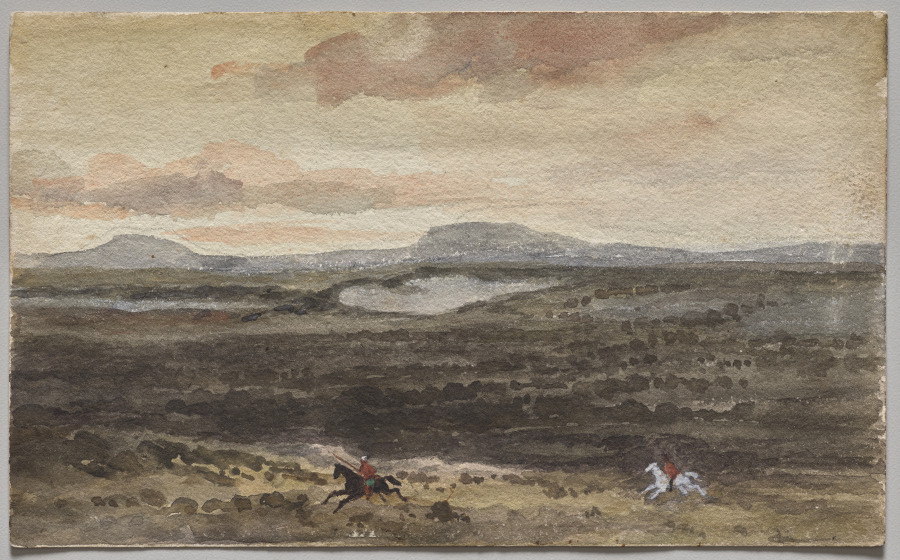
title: View of the Midwest Plains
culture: America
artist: Frédéric Auguste Bartholdi (French, 1834–1904)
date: c. 1871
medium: watercolor, graphite, ink wash, and gouache on paper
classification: Drawing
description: French artist Auguste Bartholdi is best known for designing the Statue of Liberty, a gfit from France to the United States in 1886, symbolic of freedom. He also maintained a watercolor practice throughout his career, and created a series of landscapes directly from nature while traveling across the United States in 1871 to identify a potential site for the Statue of Liberty. Here, Bartholdi depicts two figures riding horses before a landscape punctuated by distant buttes, suggesting the freedom he saw as characteristic of the United States.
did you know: During his trip across the United States, Bartholdi wrote that “This voyage will probably be a great influence on my entire career, and I am sure that great things will result from it.”